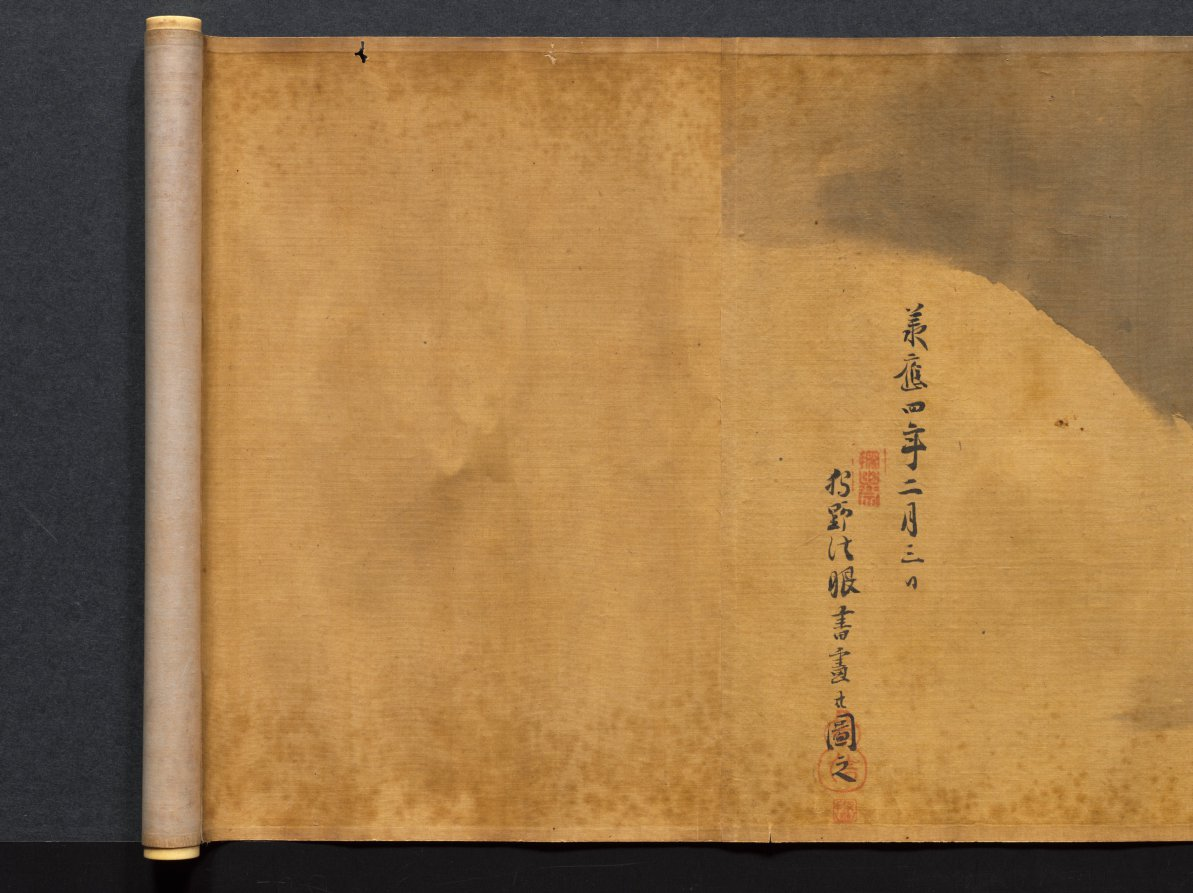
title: Eight Views of Xiao-Xiang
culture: Japan, Edo period (1615–1868)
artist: Kano Tan’yū (Japanese, 1602–1674)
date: 1615–1868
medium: handscroll; ink on silk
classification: Painting